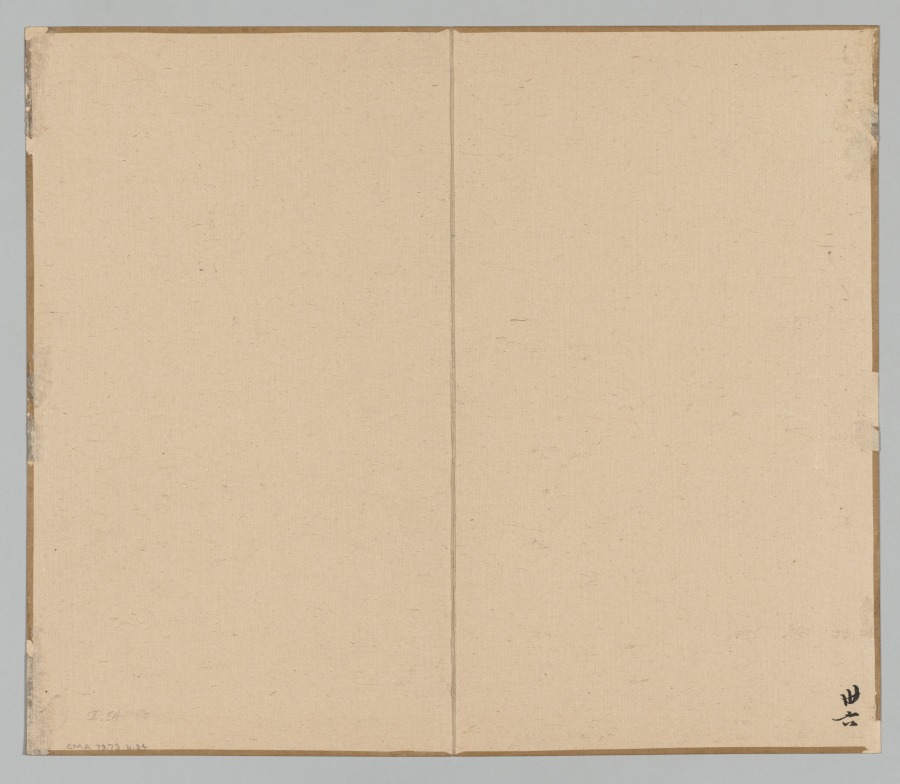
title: Reverberations of Taiga, Volume 2 (leaf 34)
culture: Japan, Edo period (1615–1868)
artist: Aoki Shukuya (Japanese, d. 1802)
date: mid- to late 1700s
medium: double-leaf from a pair of albums; ink and light color on paper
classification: Portfolio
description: Traditionally, young painters in Japan began their studies with an established master-painter. The master's compositions invariably became models that the apprentice copied to learn various ink and brush techniques. Shukuya was a pupil of the famous Kyoto artist Ikeno Taiga, whose style is reflected in these sketches of rocks, trees, and mountains.